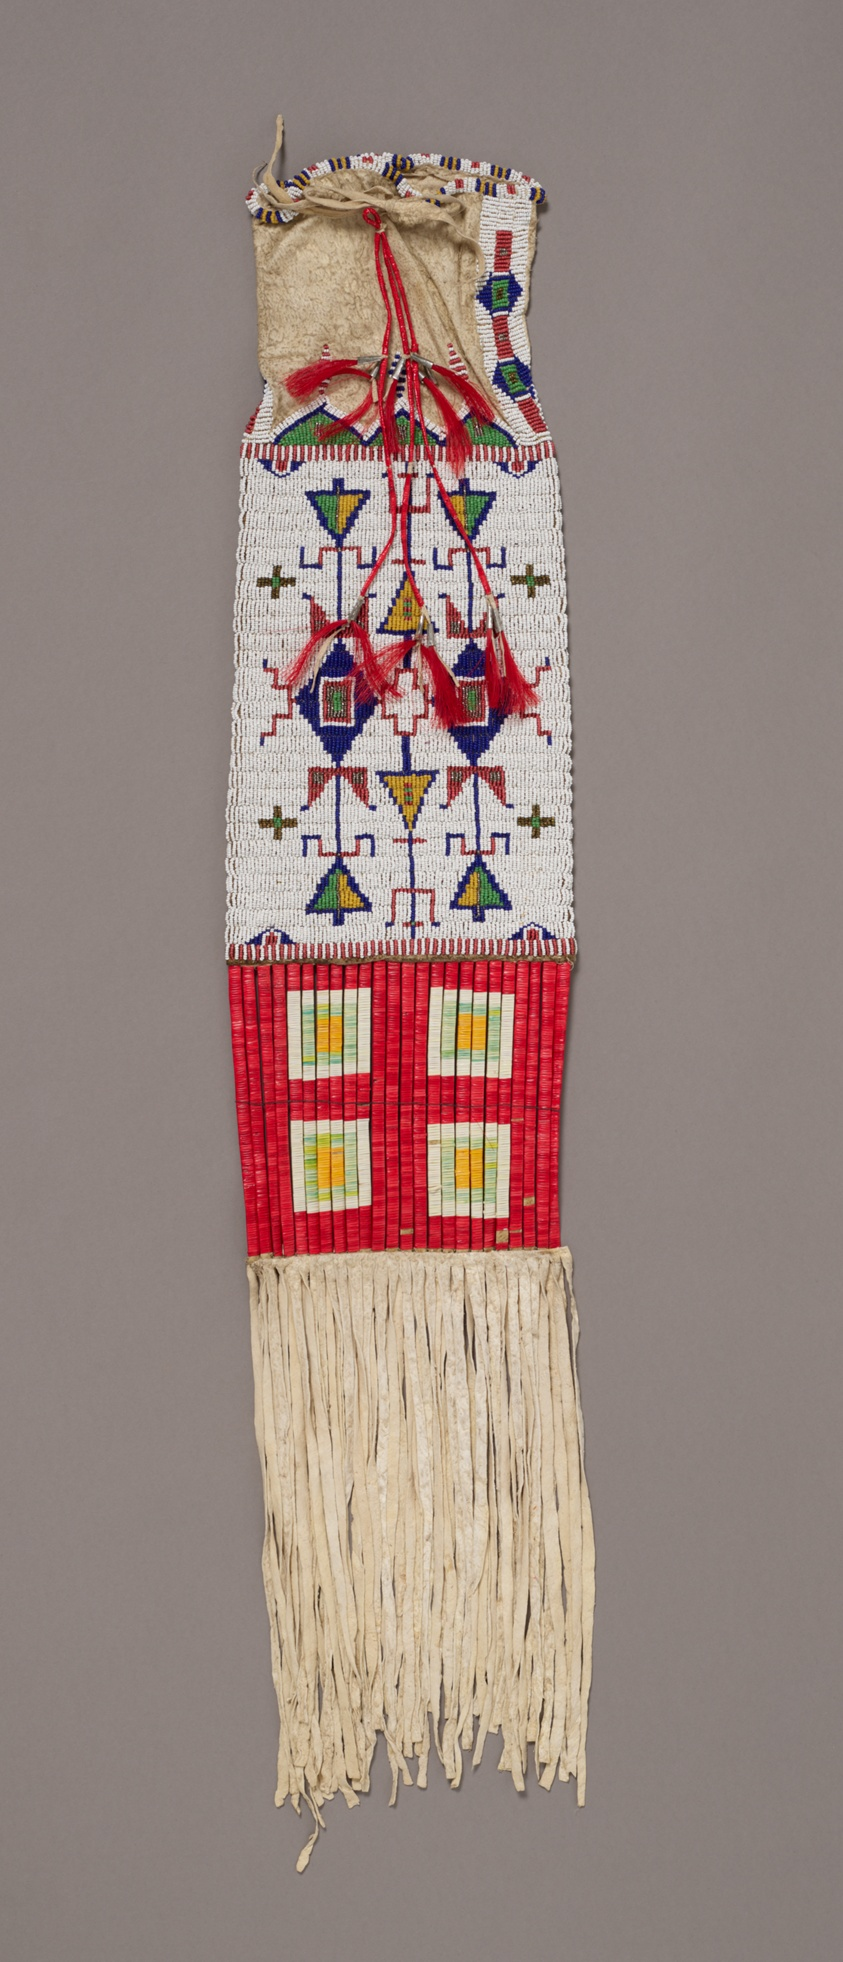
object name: Religious/Ritual Object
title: Pipe Bag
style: lakota, santee, sioux, plains indian, native american, americas, native north american, Arts of the Americas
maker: Lakota (Wyoming, central or northern Plains, United States)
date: c. 1885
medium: Deer hide, porcupine quills, tin cones, horsehair, and glass and metal beads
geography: Wyoming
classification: beadwork; art of the americas; costume accessory; ritual objects